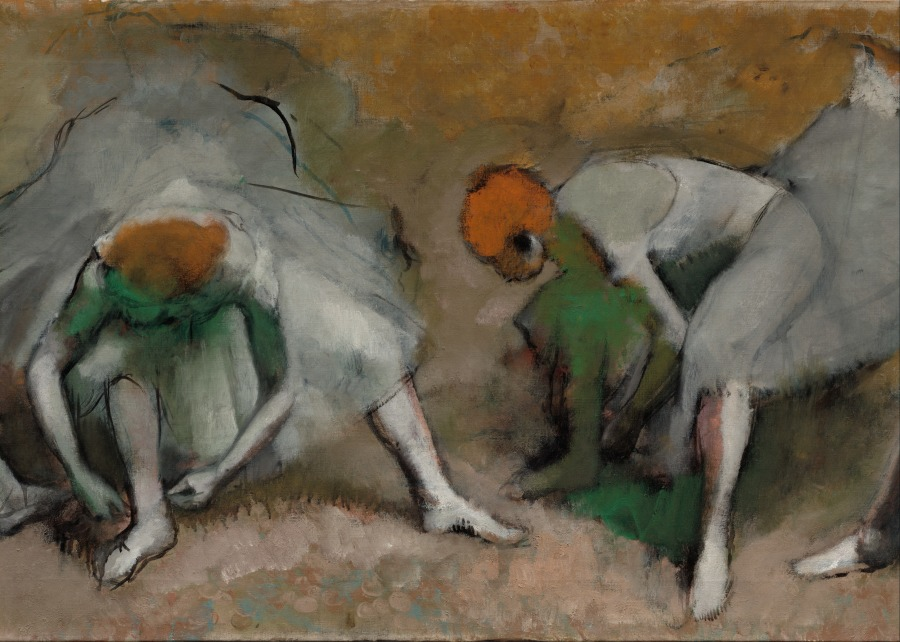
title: Frieze of Dancers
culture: France, 19th century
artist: Edgar Degas (French, 1834–1917)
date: c. 1895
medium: oil on fabric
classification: Painting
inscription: Signed in lower right: Degas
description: This painting may depict a single dancer seen from four different viewpoints. The young woman is placed in an undefined setting, surrounded by mere wisps of color, applied so spontaneously that the paint ran and dripped. Degas even added the circles in the foreground with his thumb. Such audacity, while acceptable in a small sketch, must have shocked the artist's contemporaries when presented on a six-foot canvas. Equally radical is the idea of combining multiple views of a single figure. Degas's unusual presentation may have been inspired by the photographs of Eadweard Muybridge (1830-1904)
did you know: The ballet is a subject Degas returned to again and again over the course of his career. Rather than public performances, he often depicted dancers behind the curtain, practicing, waiting, or, as in this painting, lacing up their shoes.